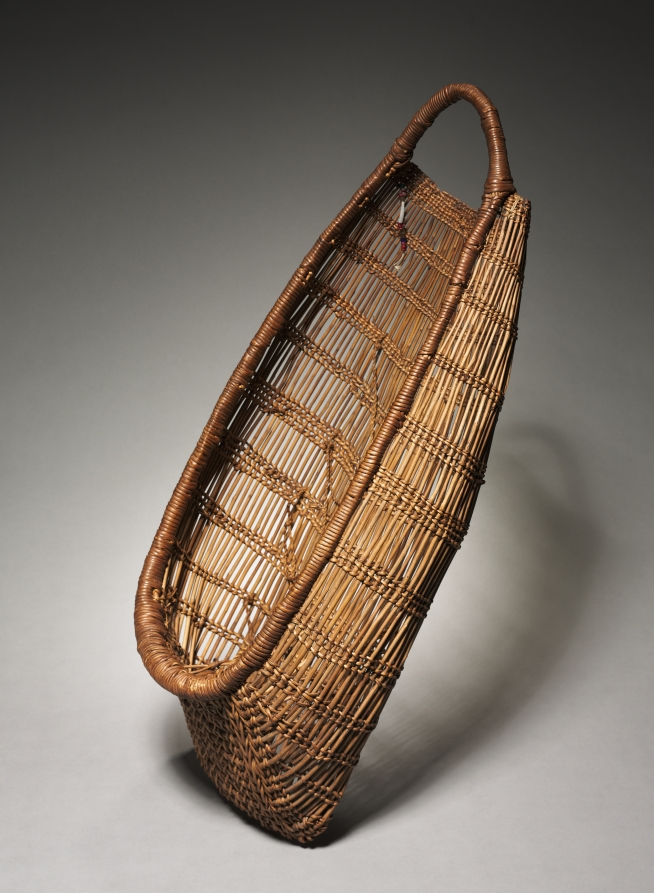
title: Cradle Basket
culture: California, Yurok or Hupa, Late 19th century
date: c 1875– 1910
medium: twined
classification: Basketry